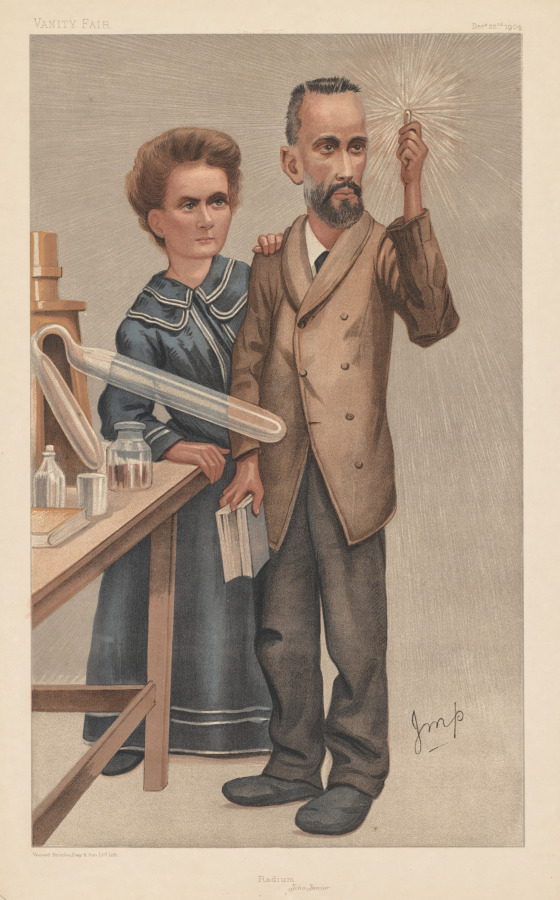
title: Radium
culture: France, 19th century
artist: Jean Baptiste Guth (French, 1883–1921)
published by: Vincent Brooks Day & Son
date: 1904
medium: color lithograph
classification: Print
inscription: artist monogram, "Imp" in stone On mat, in graphite: The Baron Alphonse de Rothschild; in graphite, verso: MOTD #597 / The Baron Alphonse de Rothschild